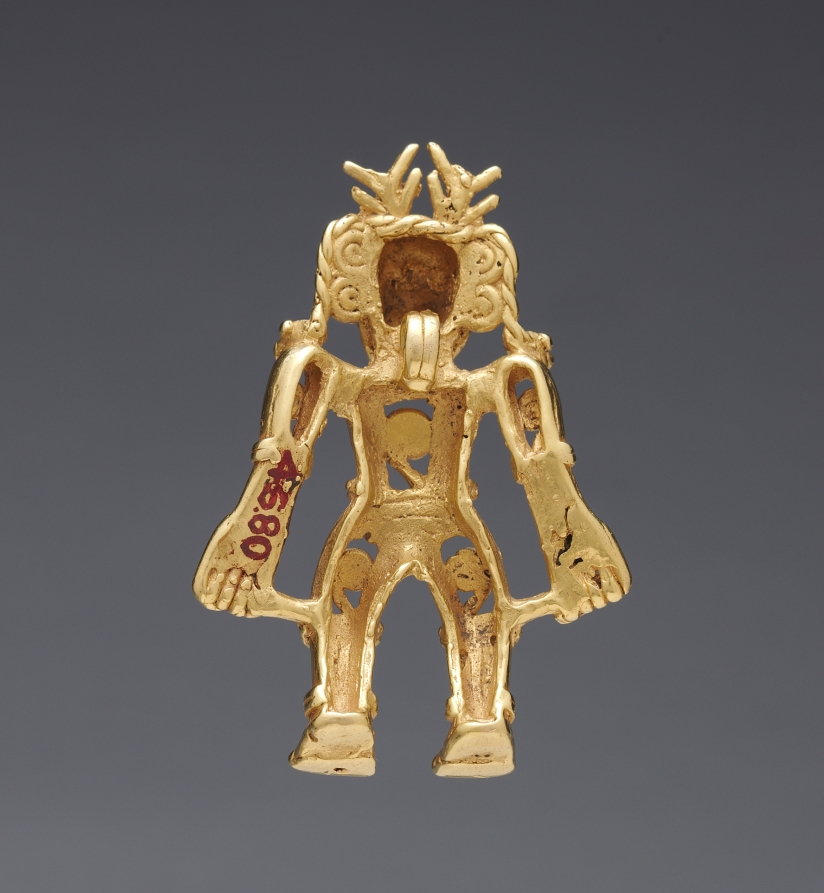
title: Figural Pendant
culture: Panama, Darién or Venado Beach region, Openwork style, 5th-8th Century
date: 400–700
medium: cast gold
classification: Metalwork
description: This emphatically male figure combines a human body with a composite animal head. The antlers are the stag's; the snout, perhaps a snarling feline's; and the hair is formed of braided serpents whose heads hiss from the figure's shoulders. The extended tongue may convey aggression or perhaps death because dying animals are depicted with lolling tongues. Either condition is in keeping with the creature's ferocity.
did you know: This ornament was made with the lost-wax casting technique.